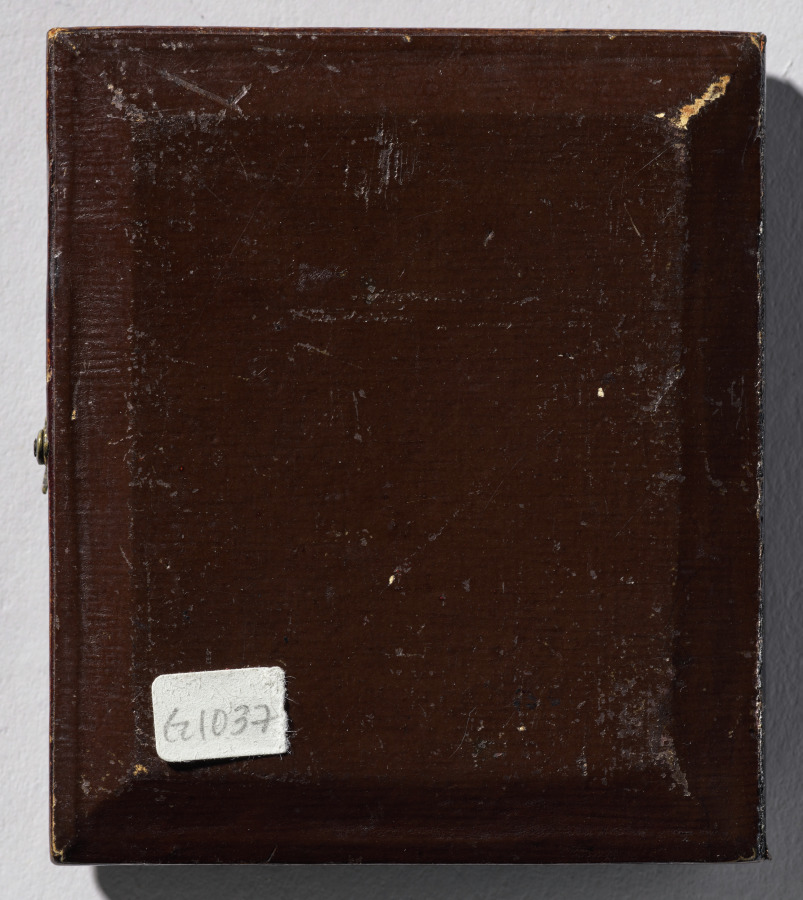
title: Girl with Doll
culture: America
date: 1850s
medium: daguerreotype, sixth plate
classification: Photograph